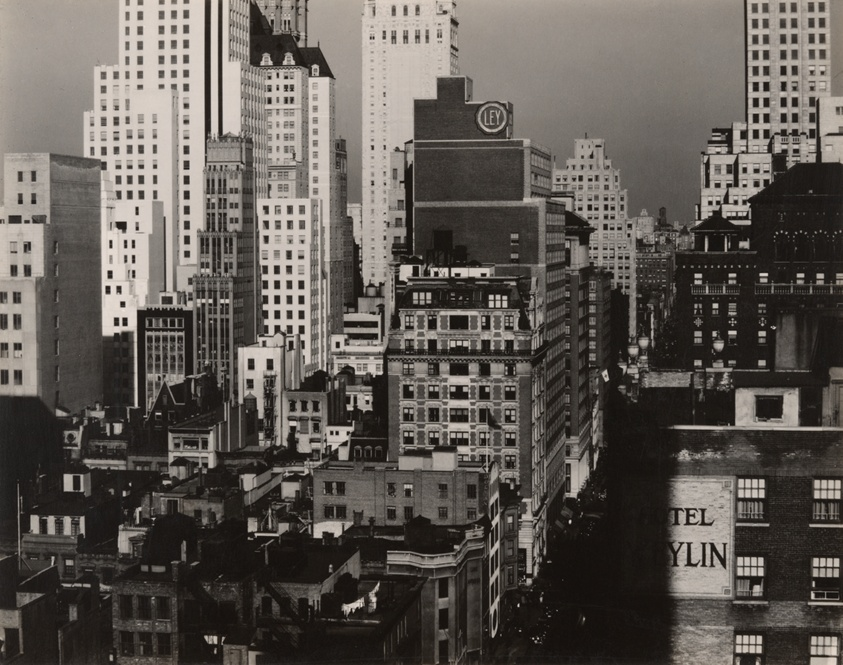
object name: Photograph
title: From My Window at An American Place, North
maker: Alfred Stieglitz (American, 1864–1946)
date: 1930/31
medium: Gelatin silver print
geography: United States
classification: gelatin silver (developing-out-paper) pr; photographic process; photography; photograph